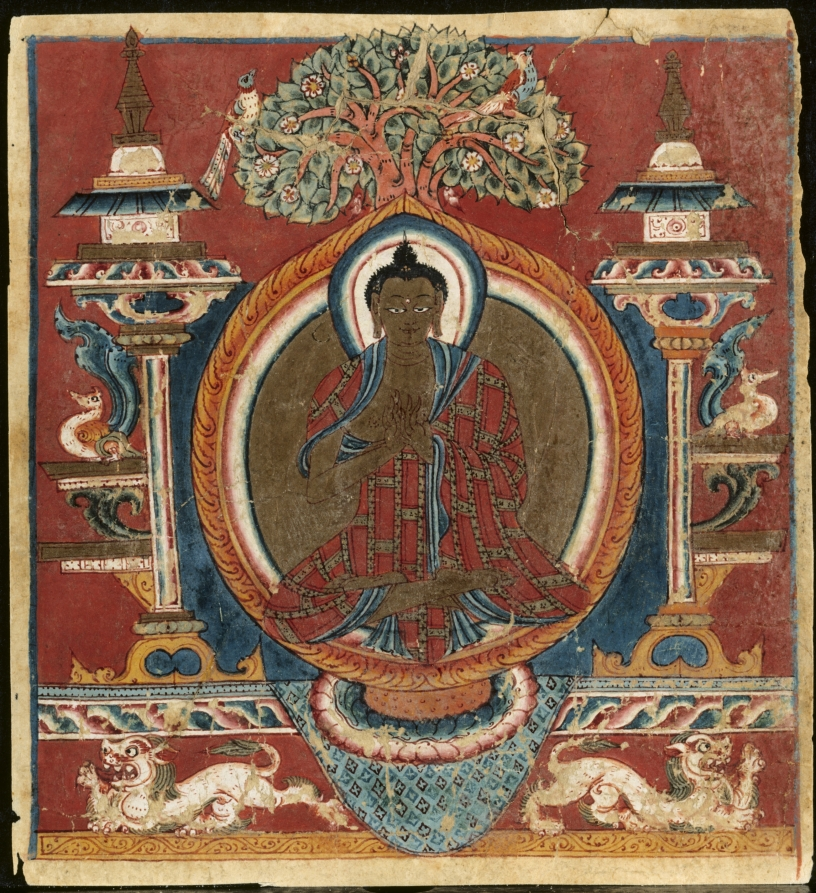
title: Votive initiation card (tsakali) with preaching Buddha Shakyamuni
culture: Western Tibet, Tholing Monastery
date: 1000s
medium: Gum tempera, ink, and gold on paper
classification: Painting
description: Buddhism was introduced to Tibet in the 7th century, but the persecution that followed in the 9th and 10th centuries destroyed all artifacts of the period. Consequently the earliest existing Buddhist art from Tibet dates to the 11th and 12th centuries, the so-called period of the Second Diffusion of Buddhism, yet few 11th- or 12th-century paintings survive. This miniature painting is one of these rare paintings. Not a manuscript illustration, it was conceived as a separate votive painting, a so-called tsa-kali. It was recovered from the Tholing Monastery, which was founded by Rinchensangpo (958-1055), the famous translator of Buddhist scriptures, who acted on the order of Yesheö, the king of Guge. Yesheö was also the father of "Lhatsun Nagaraja" (active 998-1026) whose name is inscribed on the museum's early Himalayan bronze statue of a Standing Buddha (1966.30)—one of the most important and beautiful Himalayan bronzes to survive. The museum's collection includes another important sculpture from the western Himalayas: the colorful wooden sculpture of a Seated Buddha (1986.6). The two sculptures date from the 11th century and provide a meaningful comparison with this painting, which replicates their style.